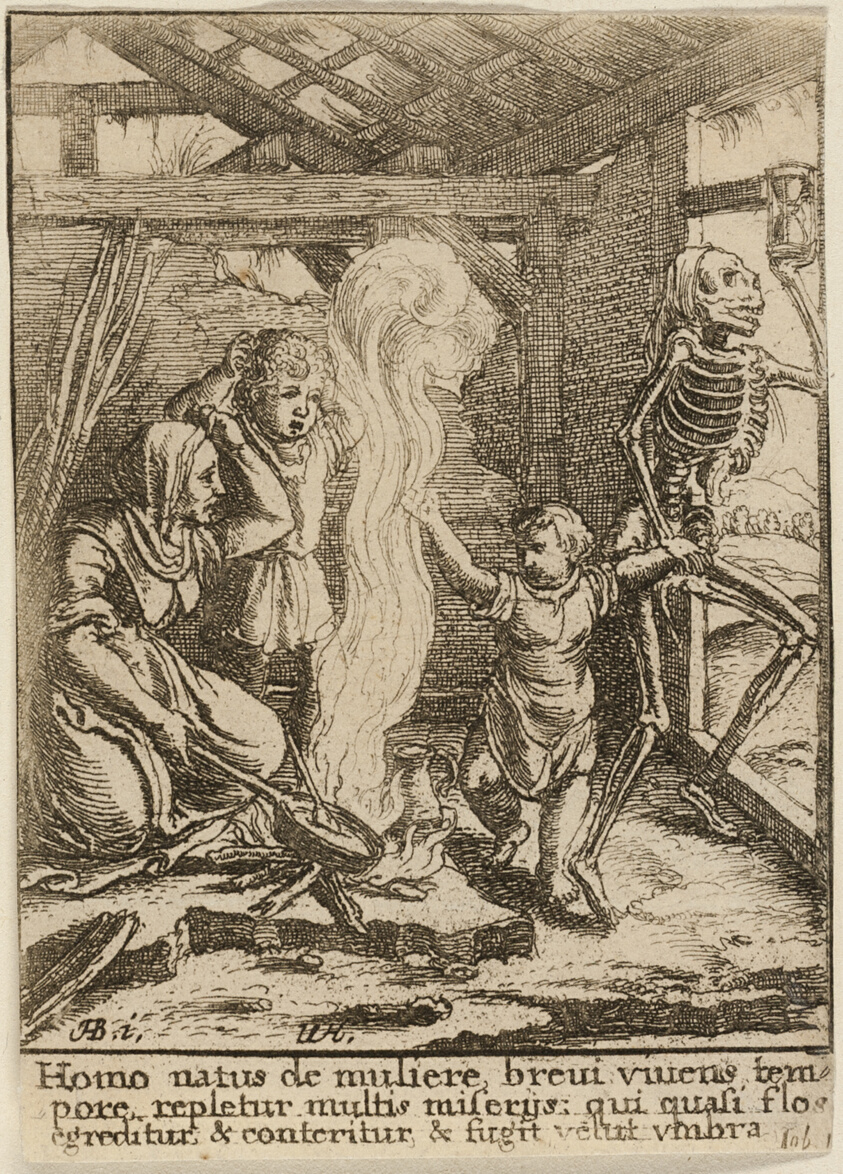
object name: Print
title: The Child and Death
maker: Wenceslaus Hollar (Bohemian, 1607-1677); after Hans Holbein the younger (German, c.1497-1543)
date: 1651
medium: Etching on ivory wove paper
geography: Bohemia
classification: etching; print; prints and drawing